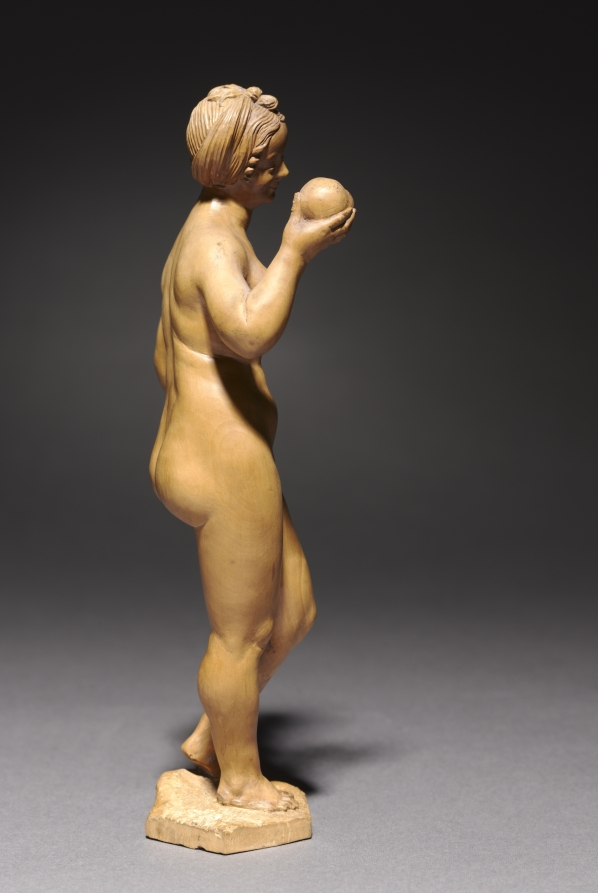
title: Eve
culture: Germany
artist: Daniel Mauch (German, 1477–1540)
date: c. 1535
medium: boxwood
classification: Sculpture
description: Mauch straddled the late medieval and Renaissance traditions across his career. These small-scale statuettes, however, each made from a single piece of boxwood, stem from the most progressive strands of Renaissance art in southern Germany, closely connected to developments in both Italian and German bronze sculpture. The bodies reveal Mauch's careful study of human anatomy as well as a rapport with Albrecht Dürer's well-known print of the same subject.